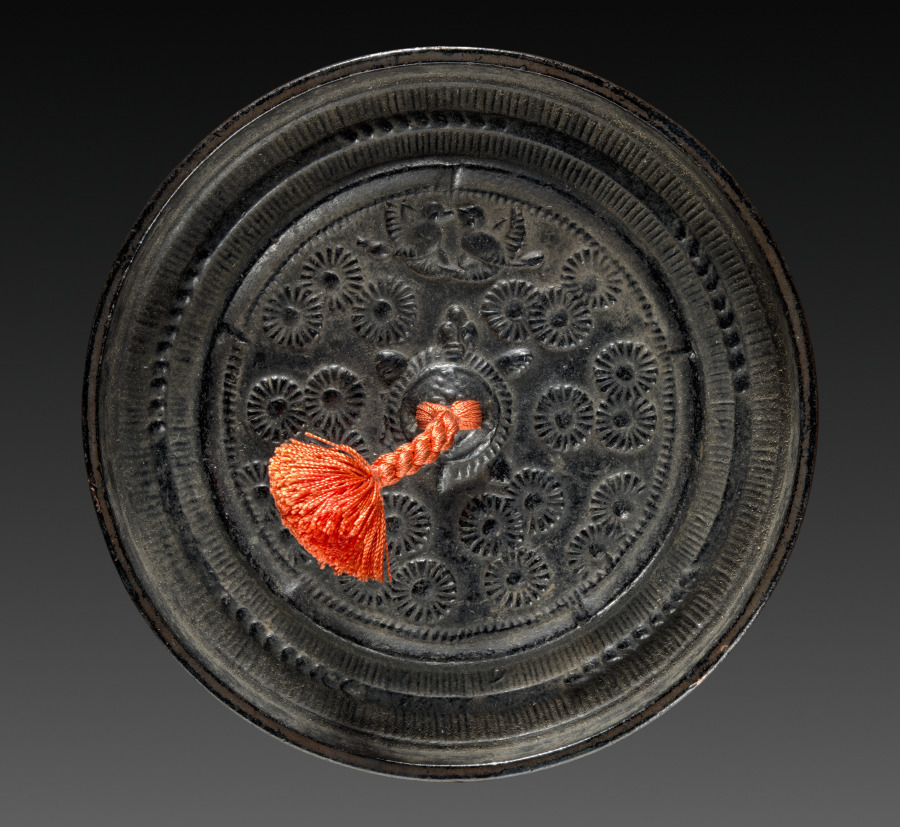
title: Mirror with Pair of Birds in Chrysanthemum Pattern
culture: Japan, Muromachi period (1392–1573)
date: 1392–1573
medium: bronze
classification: Metalwork